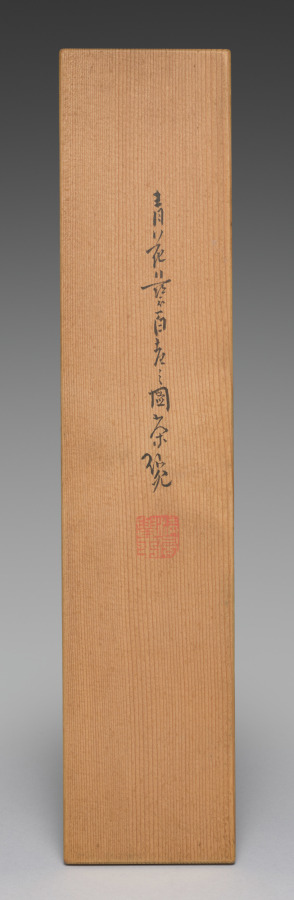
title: Teacups with a Hundred Sages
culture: Japan, Meiji period (1868–1912)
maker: Seifū Yohei III (Japanese, 1851–1914)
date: 1893–1914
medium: Set of five teacups; porcelain with underglaze blue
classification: Ceramic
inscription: 清風造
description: Each of these five teacups has a painting of identical design in underglaze blue, but as the tiny figures are drawn entirely by hand, each cup has its own personality. The theme of the sencha cups is an assembly of sages or immortals, literally “a hundred venerable [people]” (hyakurō). The myriad figures crowd the scene in groups. The god of longevity, with his tall forehead, sits with his cranes, having flown in from Mt. Penglai on the Isle of the Immortals. Seven long-bearded sages sit around a stone table, chatting and drinking; one is seated on an enormous gourd. Of course, there is a stack of books on the table, and elsewhere, scrolls are being written upon or read—in one case held very close by a sage who is wearing glasses. The design was enormously popular in ceramics made for those engaged in literati culture.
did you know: Seifū Yohei III (1851–1914) produced many works for tea gatherings where people drank Chinese-style leaf-tea (sencha).